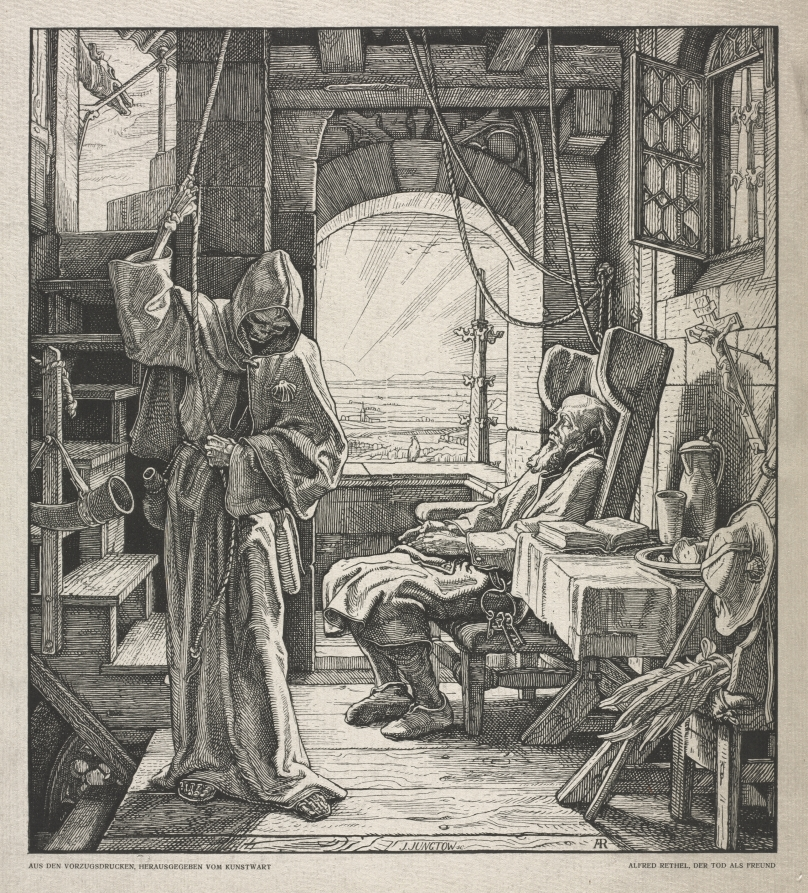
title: Dance of Death: Death as a Friend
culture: Germany, 19th century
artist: Alfred Rethel (German, 1816–1859)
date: 1850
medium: woodcut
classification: Print